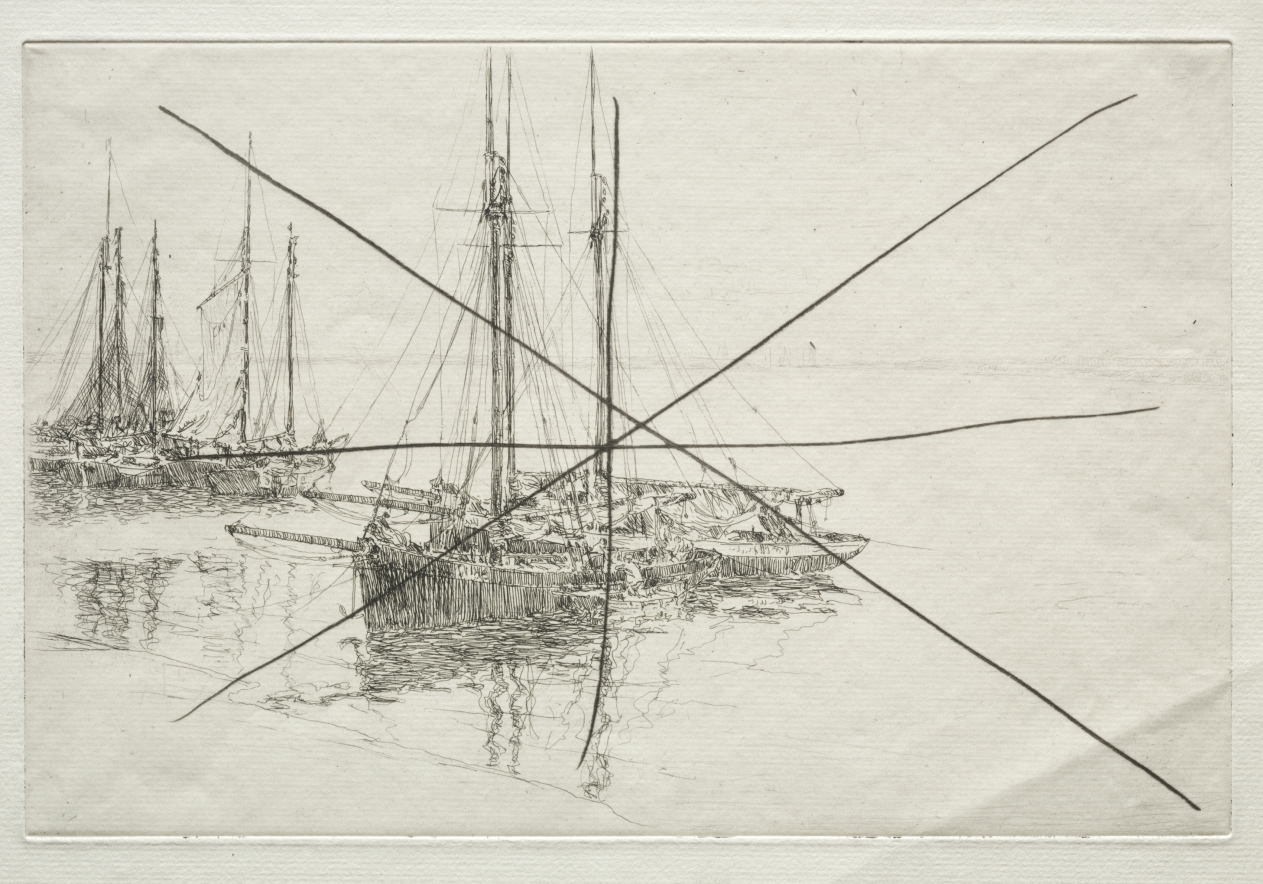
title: Oyster Dredgers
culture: England, 20th century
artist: Arthur John Trevor Briscoe (British, 1873–1943)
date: c. 1900–1937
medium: etching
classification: Print